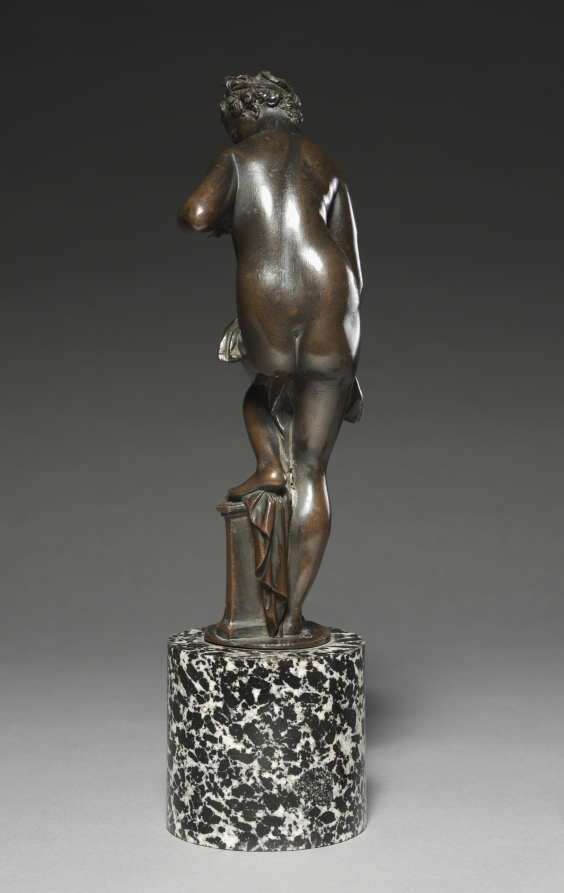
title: Venus after the Bath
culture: Italy, early 17th century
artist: cast possibly by the Workshop of Giambologna (Flemish, active Italy, 1529–1608)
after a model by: Giambologna (Flemish, active Italy, 1529–1608)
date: c. 1600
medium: bronze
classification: Sculpture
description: The statuette’s scale speaks to its likely place in private, intimate settings. The serpentine composition would have encouraged close examination from multiple angles. Compare the complexity of her pose to the relatively static Venus with a Burning Urn (1948.171).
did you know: Giambologna intended his bronze statuettes to be held and touched, to fully appreciate their smooth, elegant forms.